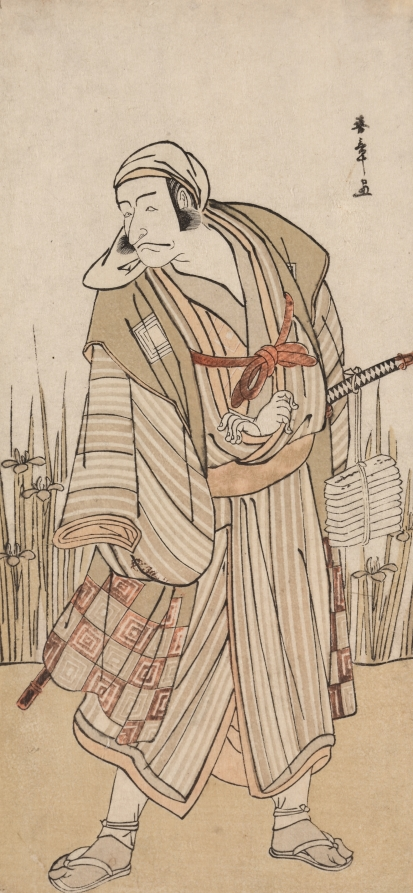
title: Ichikawa Danjuro V as a Traveller Beside a Clump of Iris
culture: Japan, Edo period (1615–1868)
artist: Katsukawa Shunshō (Japanese, 1726–1792)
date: c. 1780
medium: color woodblock print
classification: Print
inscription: Signature: Shunsho ga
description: Shunsho was a well-known painter and printmaker in Edo who dominated the actor print field in his time.